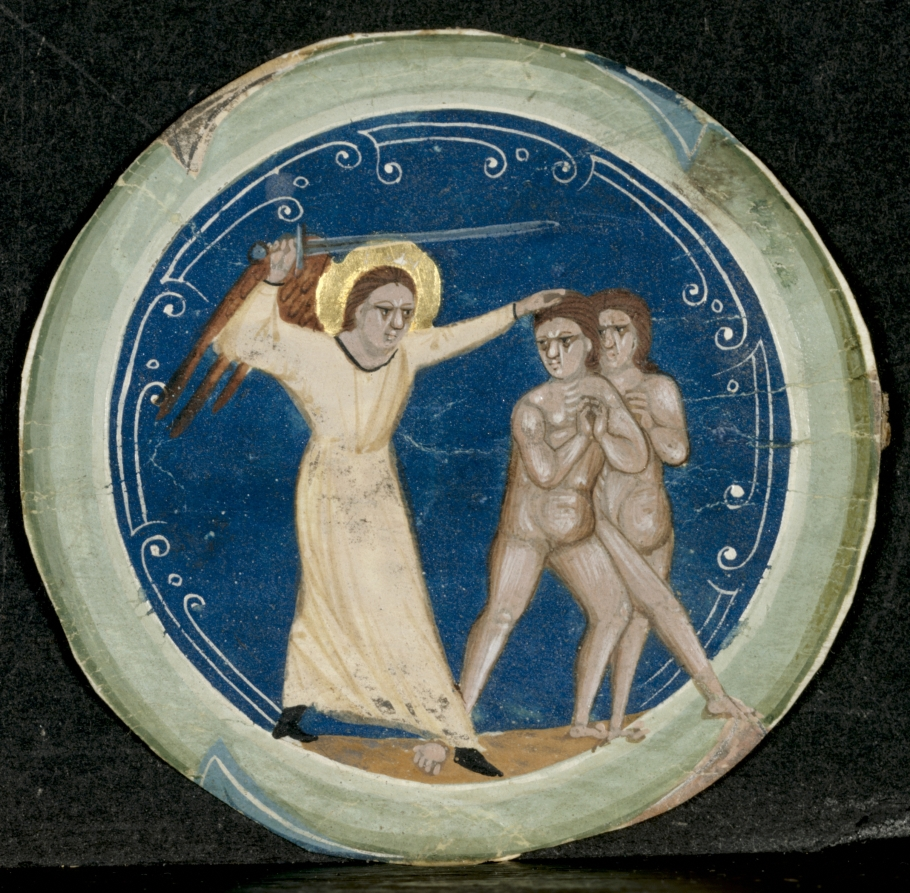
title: Medallion from the Border of a Latin Bible: The Expulsion of Adam and Eve from Paradise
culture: Italy, early 14th century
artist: Primo Miniatore di San Domenico (Italian)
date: early 1300s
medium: tempera on vellum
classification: Manuscript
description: As revealed by their subjects and blank versos (reverse sides), these medallions were undoubtedly excised from a Genesis page in a large lectern Bible. Typically, such medallions would have appeared in conjunction with a large-scale historiated initial I running the full length of the text and introducing the book of Genesis: In principio creativit Deus caelum et terram (In the beginning God created heaven and earth). Such schemes of page layout and decoration were common features of Bibles produced in Bolognese workshops and destined for wealthy religious institutions of the Emilian region, for which Bologna was the artistic and intellectual center.